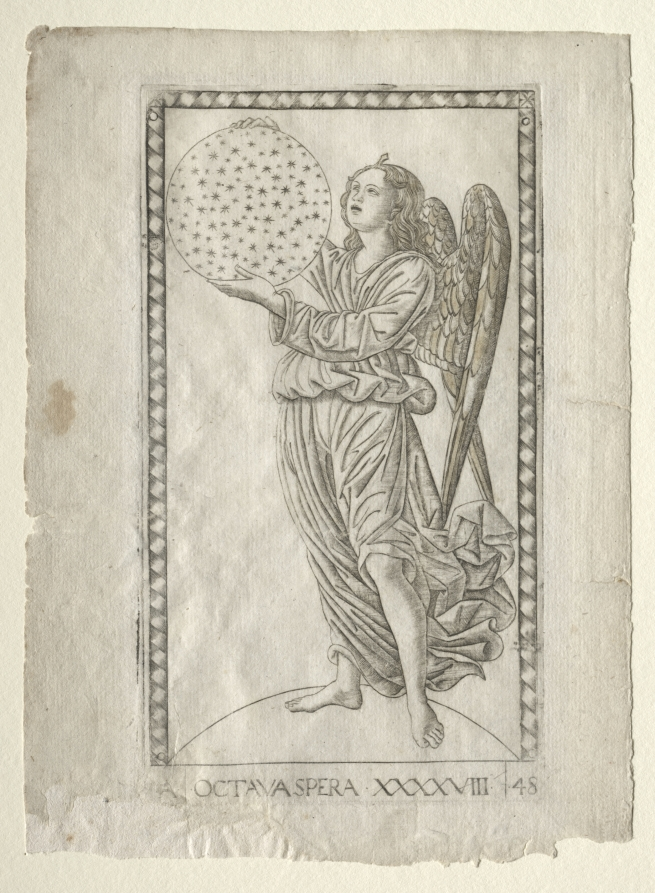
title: The Angel of the Eighth Sphere (from the Tarocchi, series A: Firmaments of the Universe, #48)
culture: Italy, Ferrara, 15th century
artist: Master of the E-Series Tarocchi (Italian, active 1460s)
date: before 1467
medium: engraving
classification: Print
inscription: Lettered below the image of Octava Spera (Eight Sphere): ·A· / ·OCTAVASPERA·XXXXVIII· / ·48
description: This engraving is part of the Tarocchi group marked with the letter “A”, and named Firmaments of the Universe. This series comprises the seven planets from the classical astronomy (Moon, Mercury, Venus, Sun, Mars, Jupiter, Saturn) and the three celestial spheres that separate them from the Supreme Entity (Prima Causa) from which everything was originated. Here, Octava Spera (Eight Sphere or the Angel of the Eight Sphere) is personified as a full-length winged figure, turned to left, and holding up a starry sphere in its hands. This stationary angel embodies the firmament as a fixed pattern of stars, which according to Ptolemaic thought was believed to revolve around the planet earth.